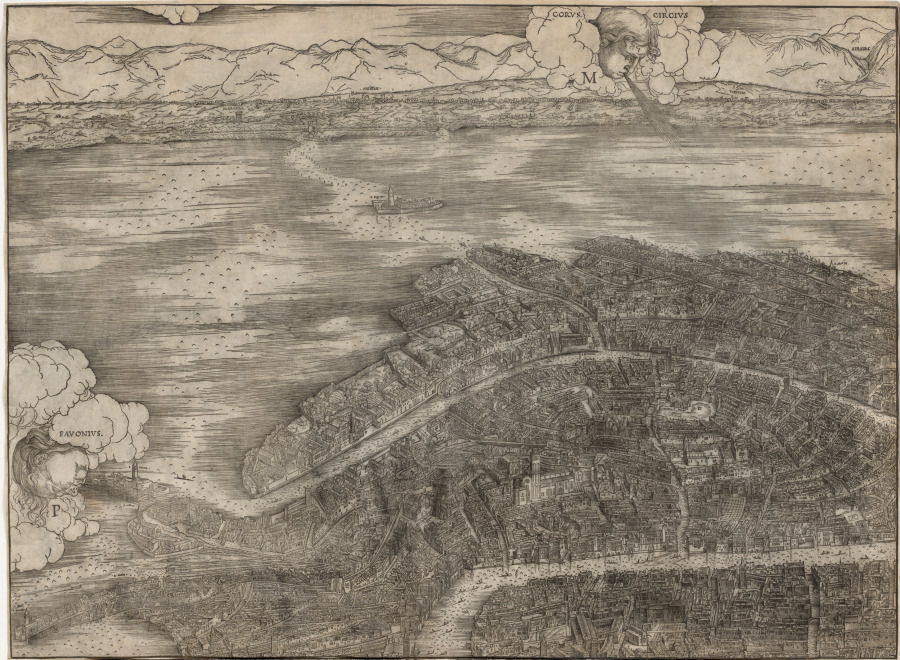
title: View of Venice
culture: Italy, early 16th Century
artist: Jacopo de' Barbari (Italian, c. 1460/70–c. 1516)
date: 1500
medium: woodcut from six blocks on six sheets of paper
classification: Print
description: By the end of the 15th century, Venice had emerged as the major printing center in Europe, where books were printed in various languages to be shipped around the world. The city also became the great emporium for prints, and the woodcut developed beyond its humble origins as a popular art for simple pious imagery, playing cards, and later for book illustration. View of Venice epitomizes this new ambitious scope for the woodcut. This monumental print can be compared in scale only to a mural decoration and presumably served as a less expensive surrogate for paintings. The six sheets that make up the design would have been pasted either onto a canvas or the wall itself, resulting in the survival of few fine impressions like this one. The goal of the print was to depict Venice as seen from above. No single vantage point would have been sufficient, so a large team of surveyors climbed various towers and tall buildings to record small sections of the city. These individual views were combined to form the map that follows a single, though inconsistent, system of perspective. Unprecedented for its exactness of detail and difficulty of execution, View of Venice represents the first attempt to render the image of a city according to the laws of geometry.